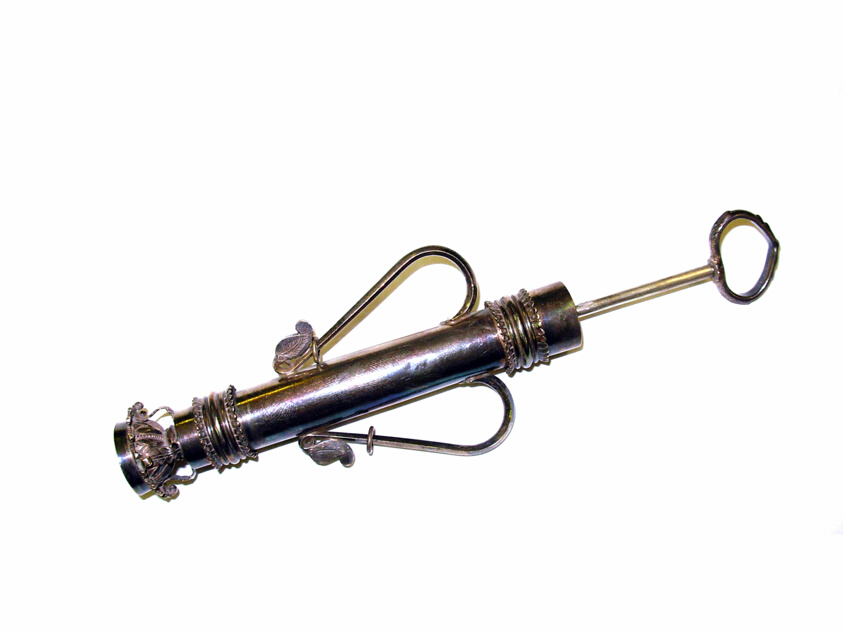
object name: Decorative Arts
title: Water Sprayer (Pichkari)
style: South Asian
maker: India; Rajasthan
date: 18th/19th century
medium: Silver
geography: India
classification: silver; metal; decorative object/ornament; asian art; decorative arts